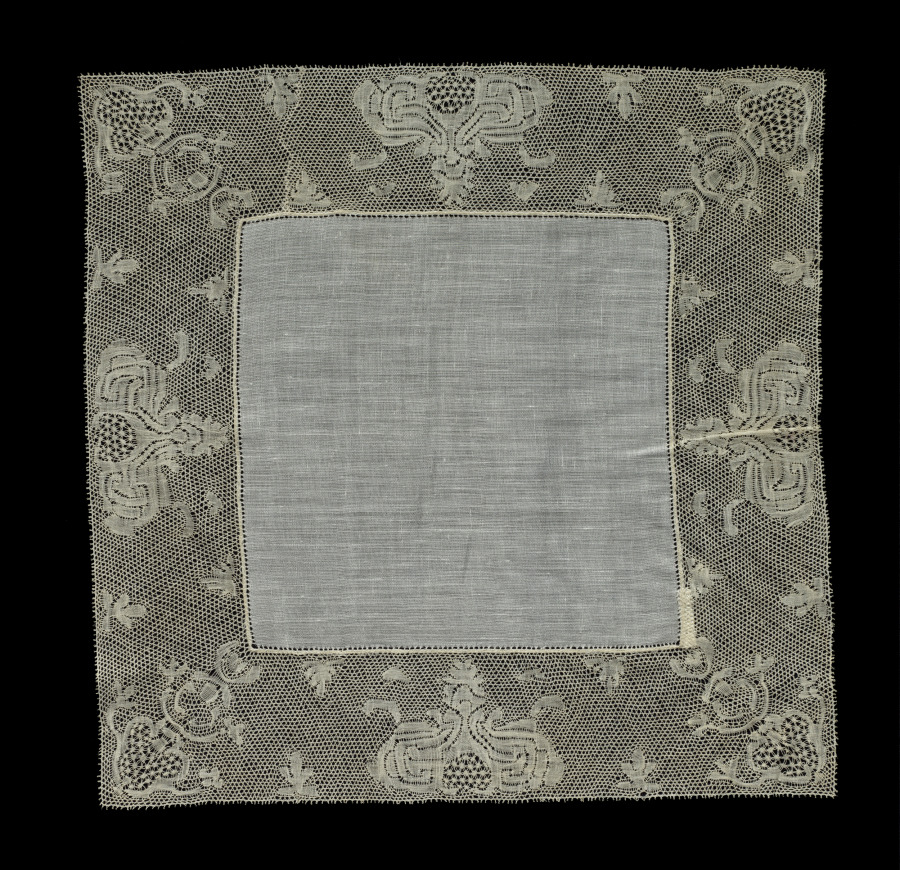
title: Lace Handkerchief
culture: Belgium, Binche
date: 1880–1935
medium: Plain weave linen center with bobbin lace (Binche lace) edging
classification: Lace